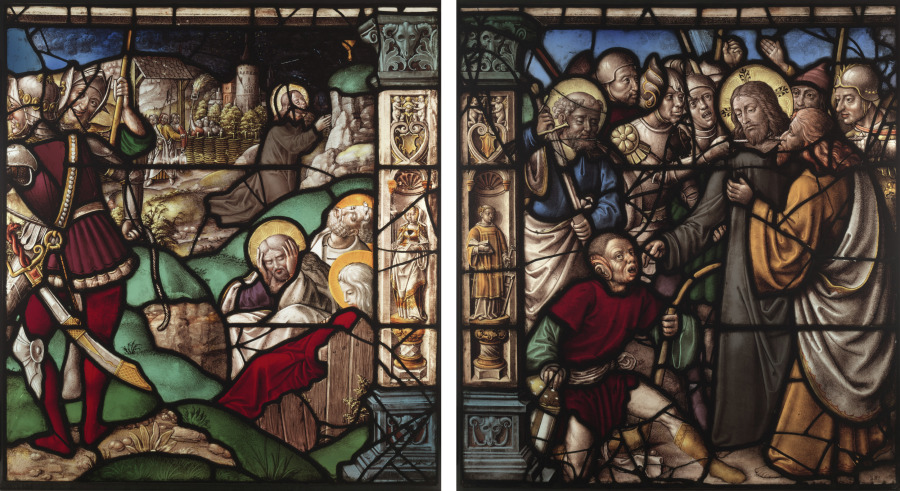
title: Christ in the Garden of Gethsemane and The Kiss of Judas (pair)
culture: Germany, Cologne, 16th century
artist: Everhard Rensig (German)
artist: or Gerhard Remisch (German)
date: 1522–1526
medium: pot-metal and white glass, silver stain and sanguine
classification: Glass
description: These two stained glass panels originally belonged to an extensive program of Old and New Testament subjects that originally decorated the cloister of the Cistercian Abbey of Mariawald, near Cologne. The original placement of glass at Mariawald involved windows composed of two openings. Each comprised three large glass panels plus a smaller tracery panel. Two scenes in each window represented Old Testament subjects (below) and the New Testament (above). Above the biblical narrative panels were smaller messenger panels depicting images of prophets with scrolls. At the base of each window were donor and patron saint panels. In this way, the Old Testament was shown to prefigure the events of the New. These two panels depicting scenes of Christ’s Passion were originally located in the north corner of the east cloister gallery with the Kiss of Judas on the left, and Christ in Gethsemane on the right. Mariawald was founded in 1480 and closed in 1802 when the stained glass windows were removed. Recent scholarship has attributed the glass to the Rhenish glass painters Everhard Rensig or Gerhard Remisch.